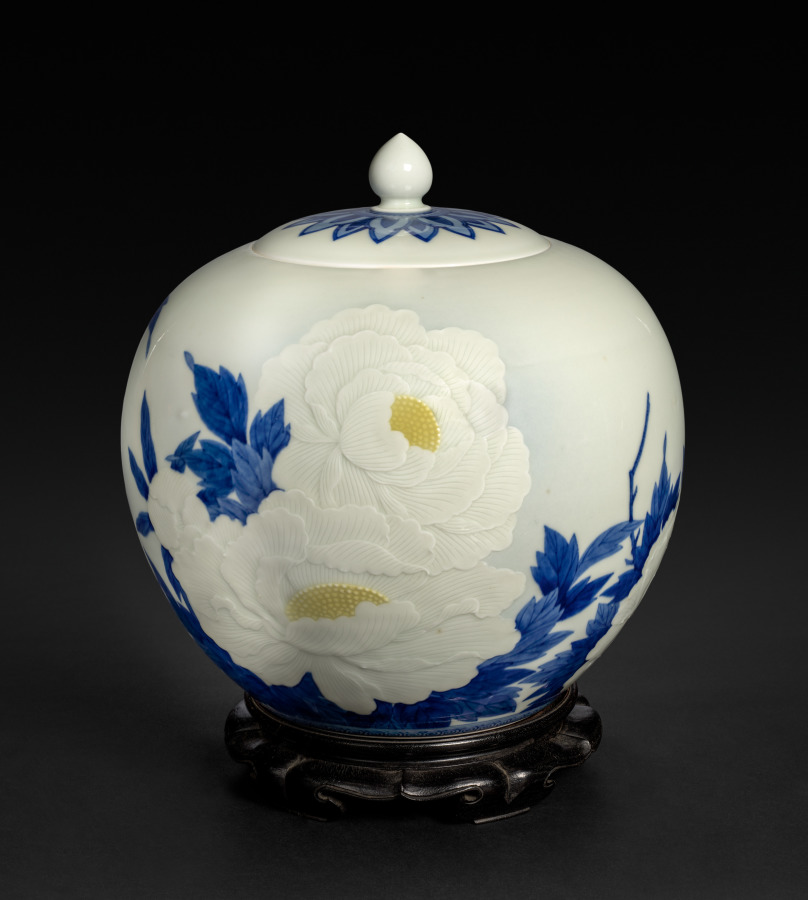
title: Lidded Jar with Peonies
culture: Japan, Meiji period (1868–1912)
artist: Seifū Yohei III (Japanese, 1851–1914)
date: 1897–1912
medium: Porcelain with molded and carved design and underglaze color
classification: Ceramic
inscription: 大日本清風造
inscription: 金聲玉振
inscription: 帝室技芸員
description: The petals of the large, white peonies on this jar were made by applying molded clay to the body and incising the clay with lines for definition. The flowers’ centers were then painted with yellow, along with the leaves in cobalt blue line and wash. A subtle blue gradation was also added all around the flowers using a masking method. The lid, with its treasured jewel-shaped finial, was also decorated with foliate motifs in underglaze cobalt blue. Finally, a transparent glaze was applied over the entire body of both the jar and lid. It is a special demonstration of Yohei III’s use of precision and control to create a completely balanced composition.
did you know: Seifū Yohei III drew inspiration from Qing dynasty Chinese wares but experimented widely with new glazing techniques.